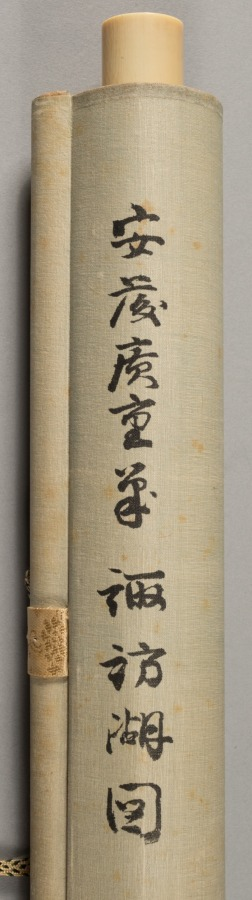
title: Lake Suwa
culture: Japan, Edo period (1615–1868)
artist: Utagawa Hiroshige (Japanese, 1797–1858)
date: c. 1832–58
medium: hanging scroll; ink and color on silk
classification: Painting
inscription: 立斎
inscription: 廣重